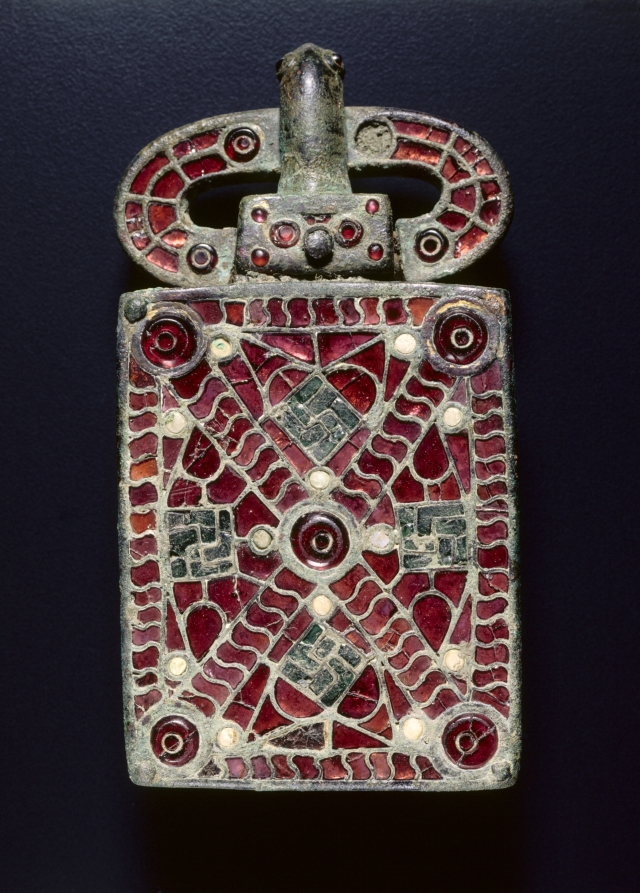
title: Belt Buckle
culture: Visigothic, Spain, Migration Period, 6th century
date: c. 525–560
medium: bronze with garnets, glass, mother of pearl, gold foil, traces of gilding; bronze and glass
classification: Jewelry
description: The art of the European Migration Period (3rd-7th centuries AD) is almost exclusively one of personal adornment-a portable art that followed men and women to their graves. Belt buckles with large rectangular attachment plates have been discovered in cemeteries across the Iberian Peninsula-now occupied by Spain and Portugal-from the period of Visigothic occupation (about AD 412-711). Their decoration varies. Finer examples, like this one, are distinguished by brilliantly inlaid semi-precious stones and colored glass. Garnets were especially prized in Visigothic society for use in cloisonné jewelry. The technique involved the fitting of carefully cut pieces of polished garnet into an intricate grid of compartments, or cloisons. This buckle is so densely inlaid with garnets that it presents a virtual "carpet" of red to the eye. These large Visigothic buckles are strikingly uniform in shape yet endlessly varied in surface design, perhaps a sign that they expressed the personal identities of their original owners. Grave excavations have shown that belt buckles of this type were made for women.